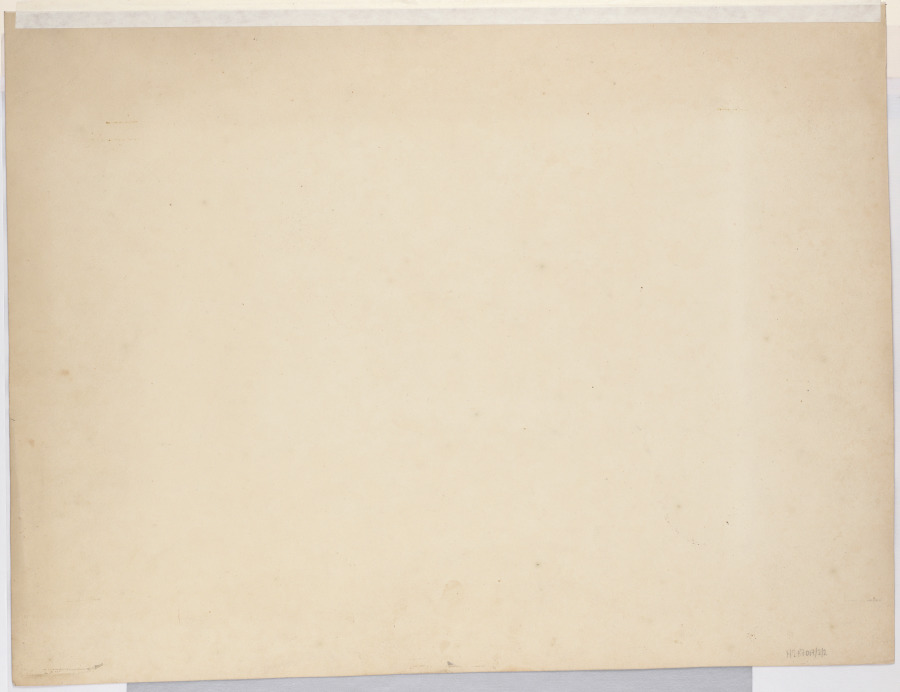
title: Convolvulus and Metamorphosis of the Convolvulus Hawk Moth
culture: Netherlands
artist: Maria Sibylla Merian (German, active Netherlands, 1647–1717)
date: c. 1670–90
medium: watercolor with touches of opaque watercolor over indications in black chalk or graphite on vellum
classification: Drawing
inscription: recto, signed, lower right in brown ink: M. Sybilla Merian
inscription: inscribed lower right above signature in graphite: No 61 and lower left in graphite A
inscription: on mount, brown ink, Surinamse Liguster pylstaart Uyl met de Rups en sop and No. 45. A. and Sibilla Merian fecit 1670.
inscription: on mount, underneath sheet, inscribed, brown ink, Sibilla Merian fe.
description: The artist Maria Sibylla Merian was one of the most important entomologists of the 17th century. Her studies of caterpillars, which she reared herself, contributed to knowledge of the life cycles of numerous species. Trained as a miniature painter by her stepfather, she combined her artistic talent with her scientific interest, creating images such as this one, which portrays the life cycle of the European pink-spotted hawk moth as well as its favorite food, the morning glory. Merian added additional caterpillar species to the sheet to create a pleasing and astonishingly detailed composition.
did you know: The artist who drew this life cycle of the European pink-spotted hawk moth from egg through caterpillar, pupa, and adult insect reared caterpillars in her home for 10 years before writing and illustrating a definitive text on metamorphosis.